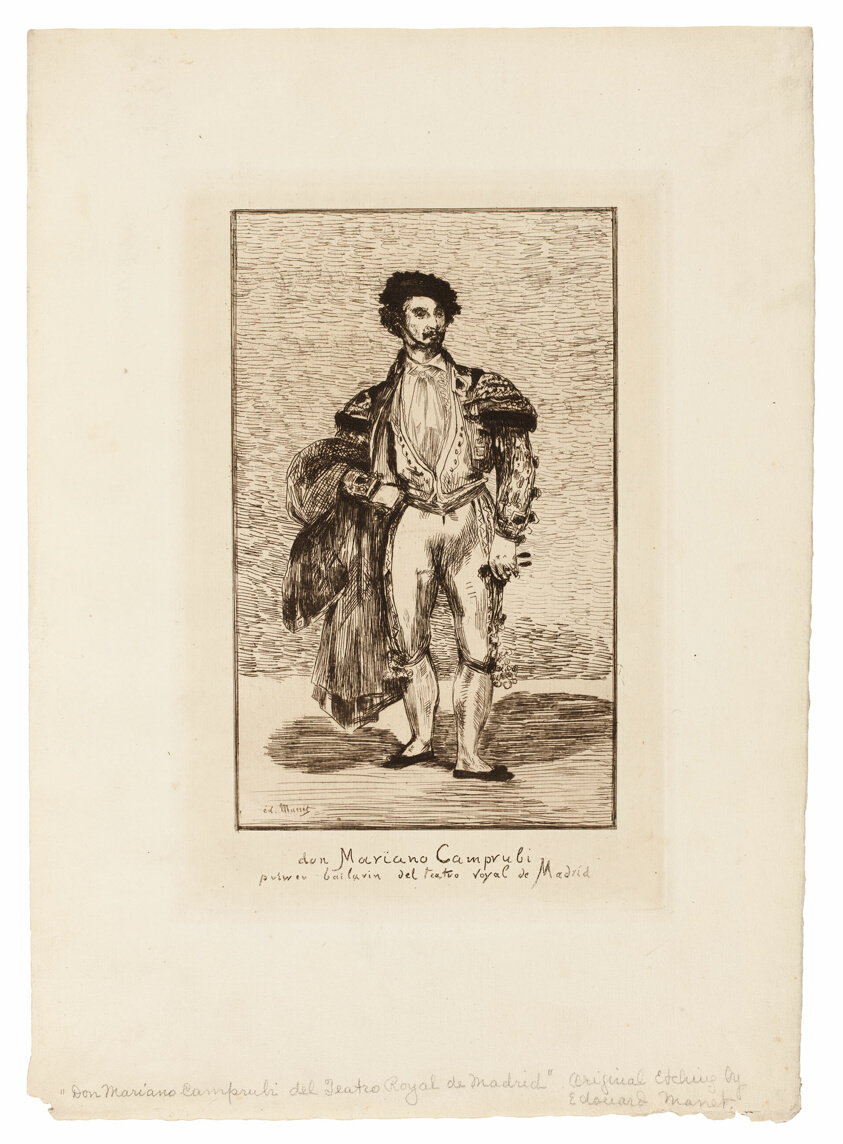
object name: Print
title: The Ballet Dancer (Don Mariano Camprubi)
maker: Édouard Manet (French, 1832-1883)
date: 1862–63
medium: Etching in brown on cream laid paper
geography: France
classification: etching; print; prints and drawing